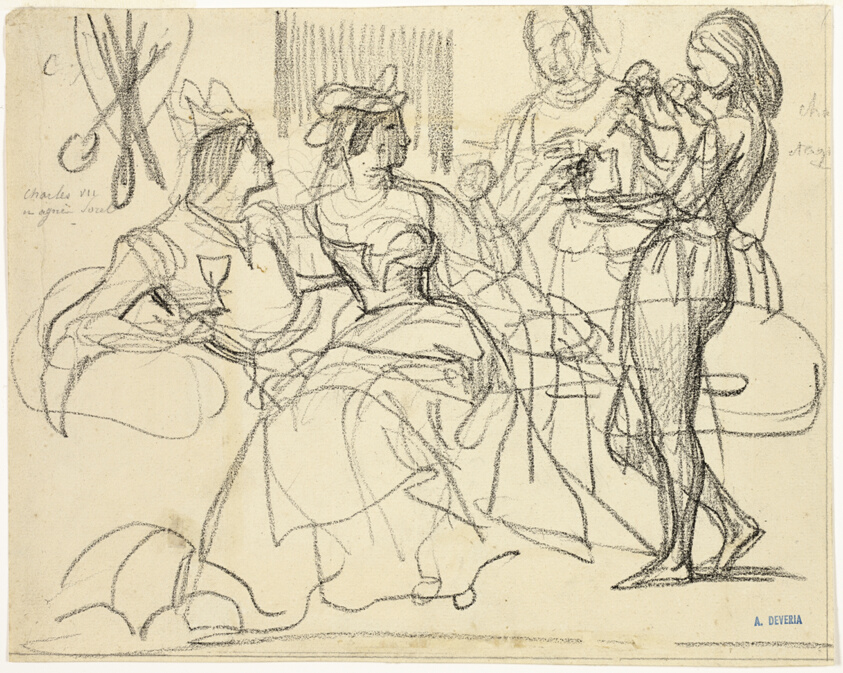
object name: Drawing and Watercolor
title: Study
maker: Achille Devéria (French, 1800-1857)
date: 1839/42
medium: Black crayon on cream laid paper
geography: France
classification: chalk; drawings (visual works); prints and drawing